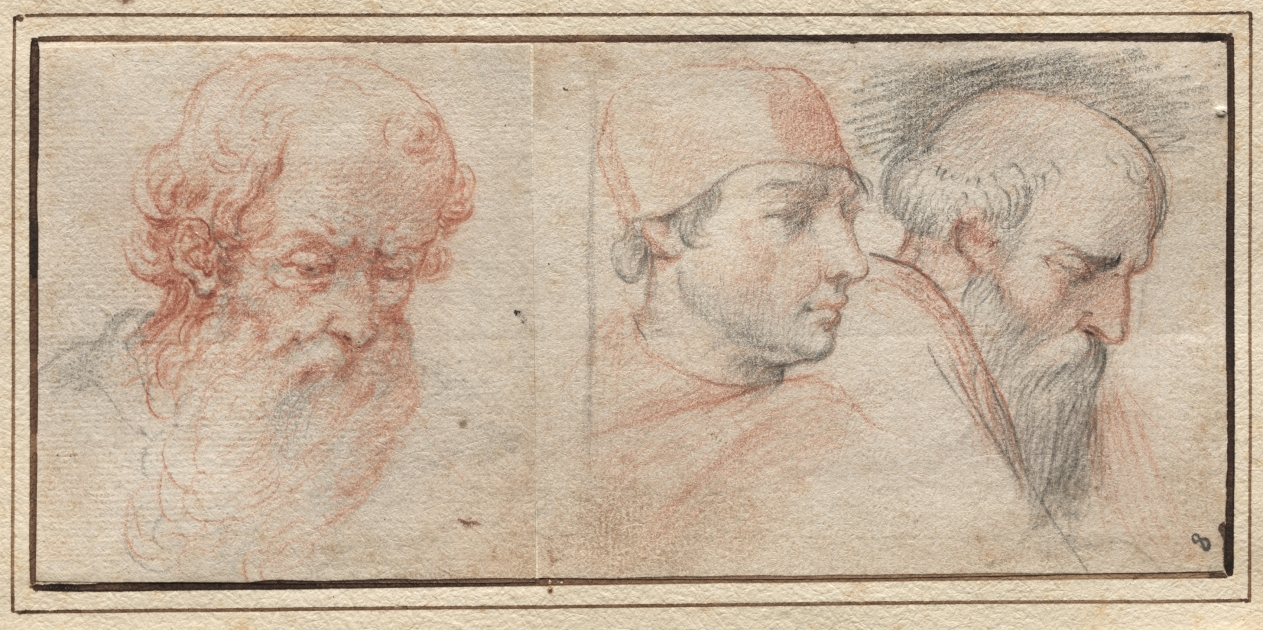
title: Three Head Studies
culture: Italy, 17th century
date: 1600s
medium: red and black chalk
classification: Drawing